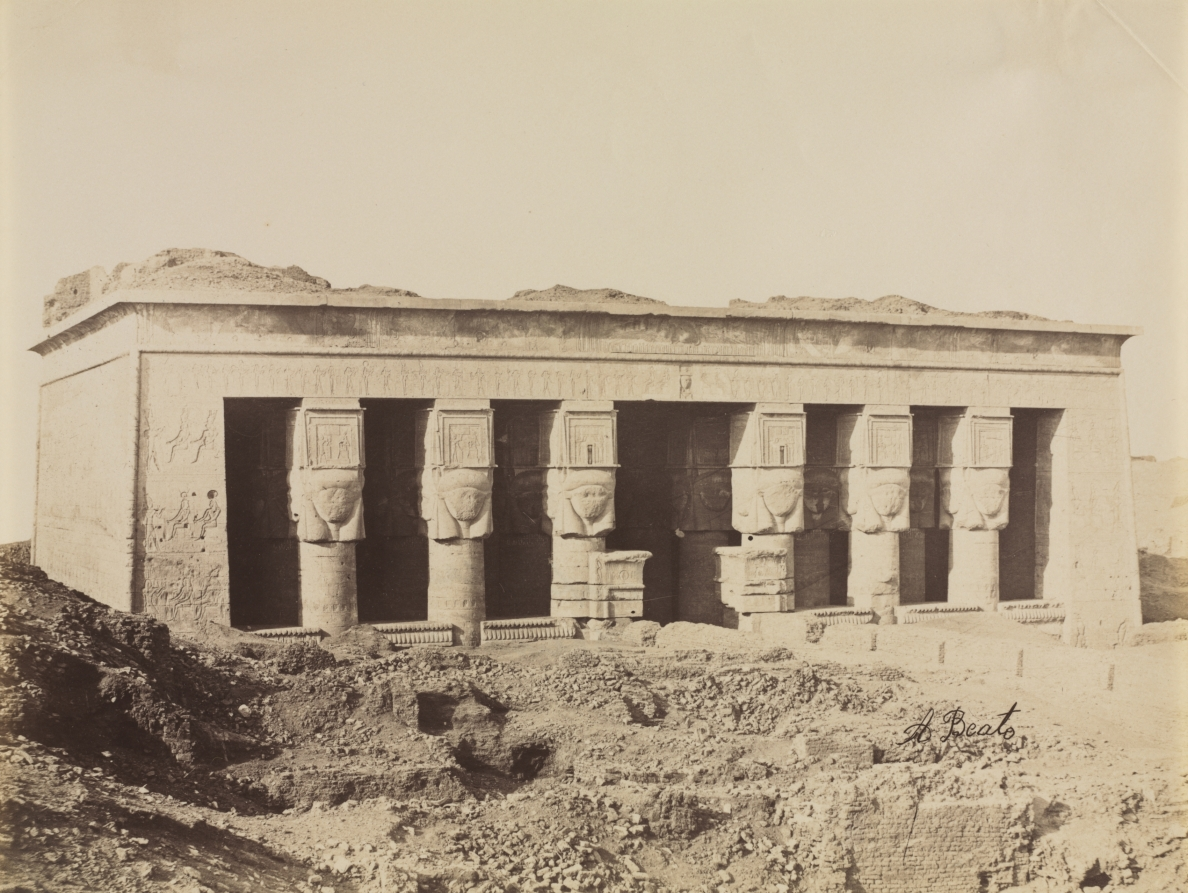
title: Temple of Dendera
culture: England, 19th century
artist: Antonio Beato (British, c. 1825–1903)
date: c. 1870s - 1880s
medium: albumen print from wet collodion negative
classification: Photograph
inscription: Written in pencil on verso: "334/temple de/Denderah"; "AB-5298-Z"